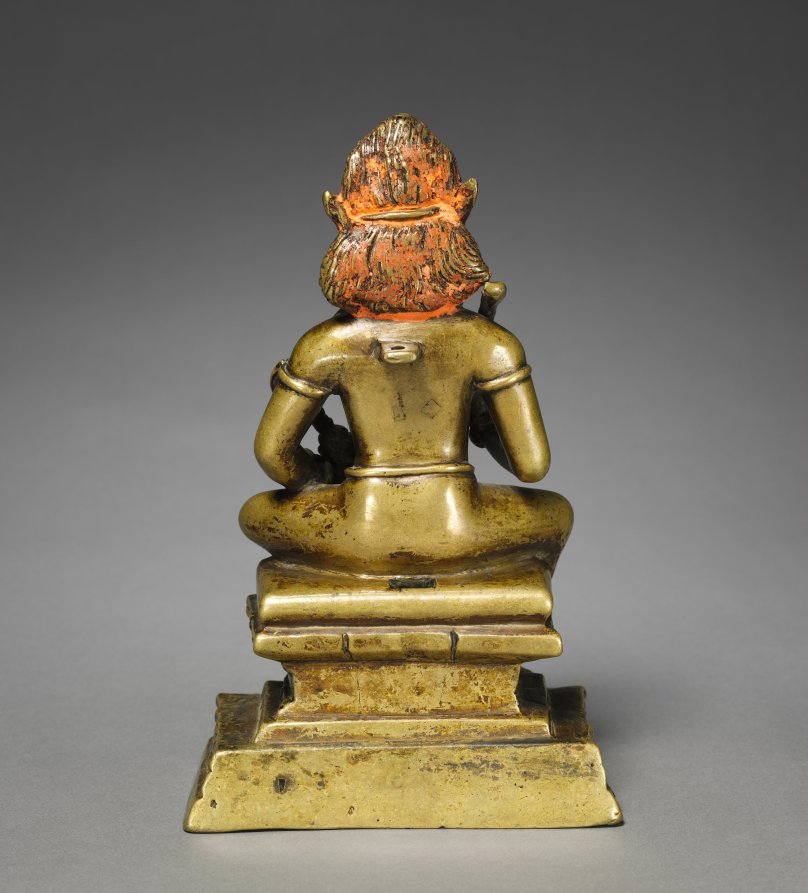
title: Vajrapani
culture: India, Kashmir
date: 700s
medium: bronze with silver overlay and gum tempera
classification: Sculpture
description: The name Vajrapani means “he who holds (pani) the thunderbolt (vajra)” in Sanskrit. Adopted by Buddhists as a protector not only in India and the Himalayan regions of Nepal and Tibet, Vajrapani also was incorporated into art of China, Korea, and Japan. The attributes of the thunderbolt and the club were derived from images of Zeus and Hercules that travelers from the Mediterranean world brought to the region as early as the 320s BC. This rare, early bronze image of Vajrapani visually conveys his power to overcome fear and obstacles to enlightenment, and for this reason he is invoked by Buddhist practitioners. He sits on a pedestal in the form of a rocky mountain populated with wild lions, and he has tamed poisonous snakes to use as ornaments.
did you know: A hole on the back once held a halo behind his head.